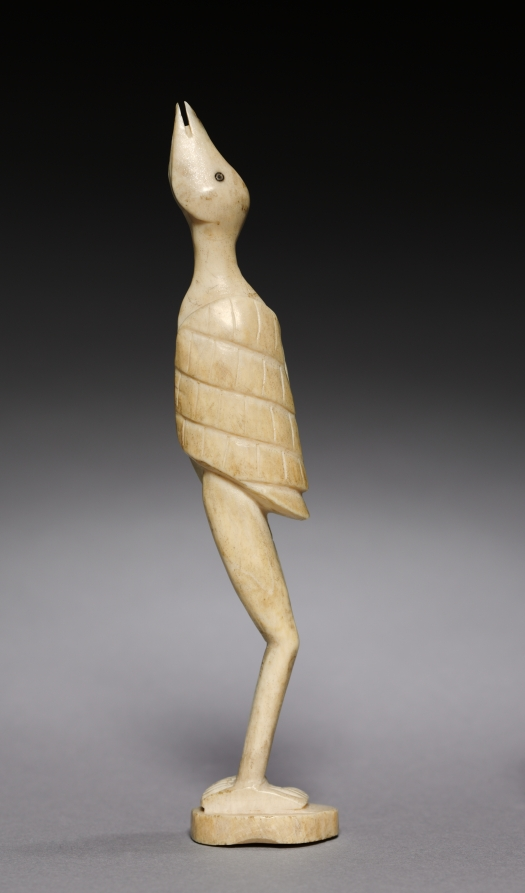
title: Bird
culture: Africa, Central Africa, Democratic Republic of Congo, unknown maker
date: 1900s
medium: Elephant ivory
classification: Sculpture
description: This long-legged bird of an unidentified species was most likely carved as a souvenir.